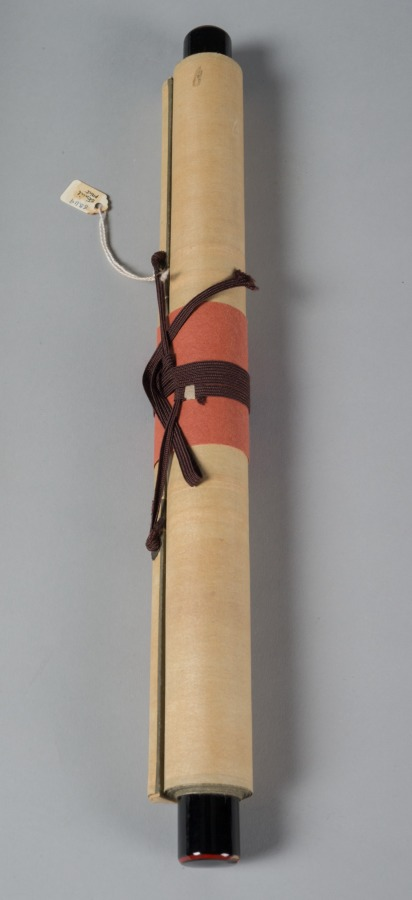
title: Twelve Buddhas and Kobo Daishi (Jusanbutsu)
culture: Japan, Edo period (1615–1868)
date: late 1600s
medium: stencil print (Kappa-zuri); ink and color on paper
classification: Print